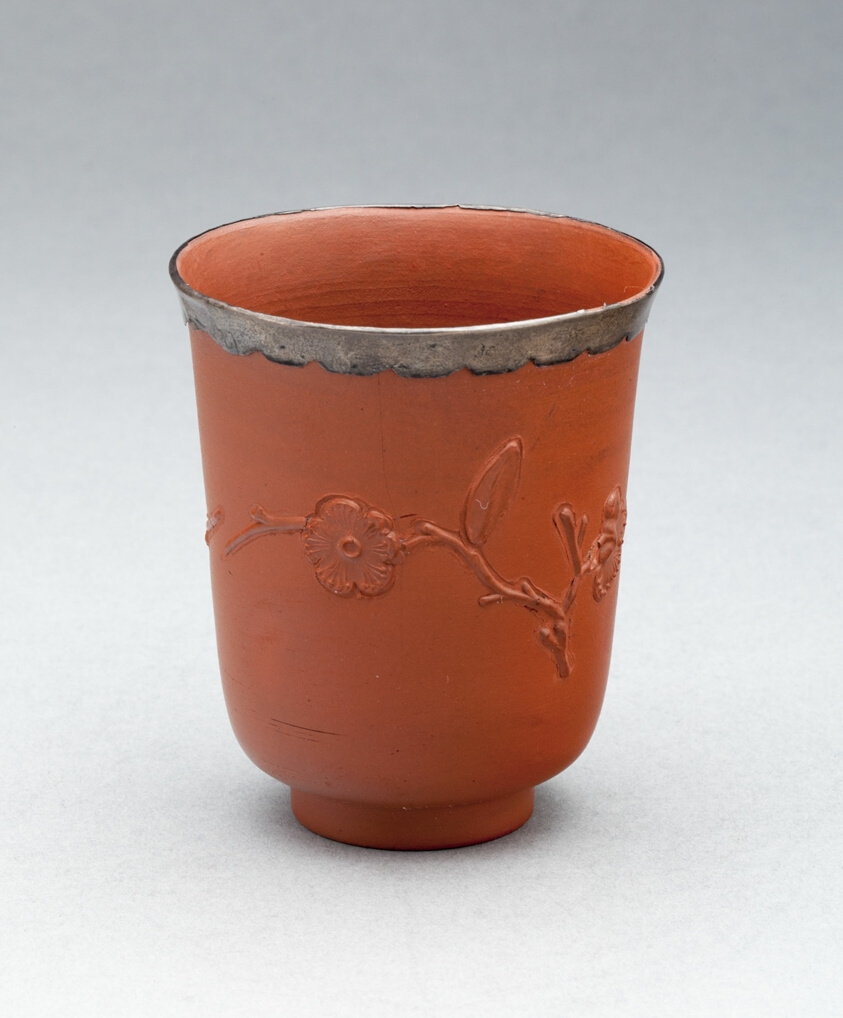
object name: Ceramics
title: Beaker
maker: England, Staffordshire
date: c. 1695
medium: Earthenware (redware), silver mount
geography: Staffordshire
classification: drinking vessel; earthenware; redware; silver; european decorative arts; ceramics